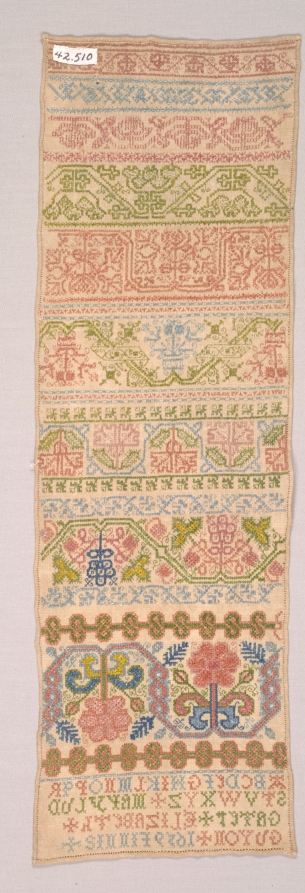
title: Long Sampler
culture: England, 17th century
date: 1659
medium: embroidery: silk on linen tabby ground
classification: Sampler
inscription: below: "ABCDEFGHIKLMNOPQR/ STVWXYZ MARY LUD/ GATER+ELIZABETH/ GUYON 1659 FINNIS."